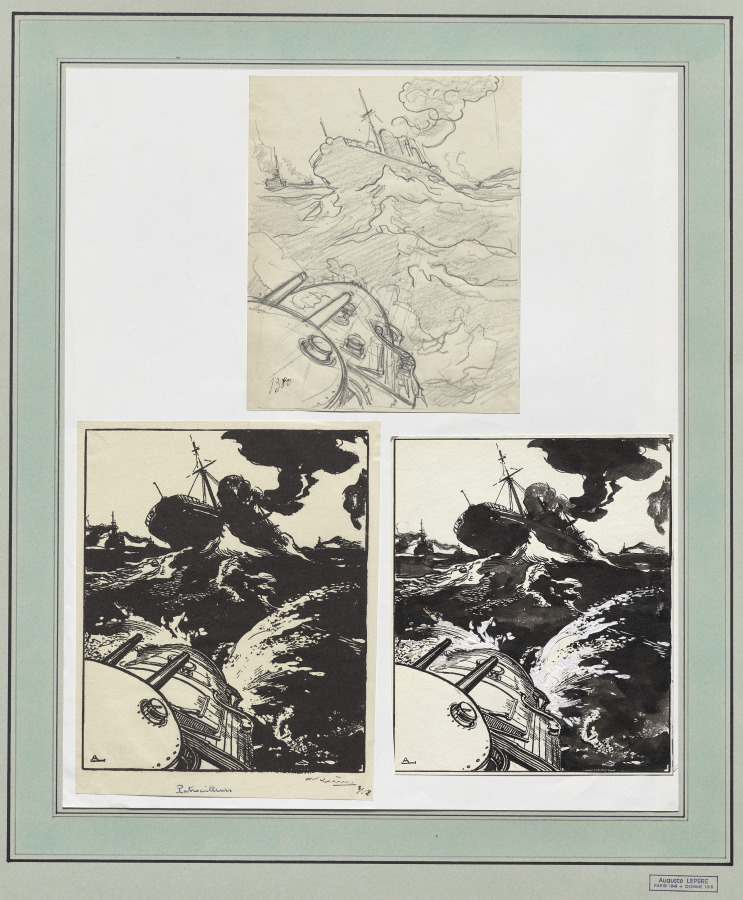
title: Patrouilleurs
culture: France, 20th century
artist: Auguste Louis Lepère (French, 1849–1918)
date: 1914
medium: pencil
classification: Drawing